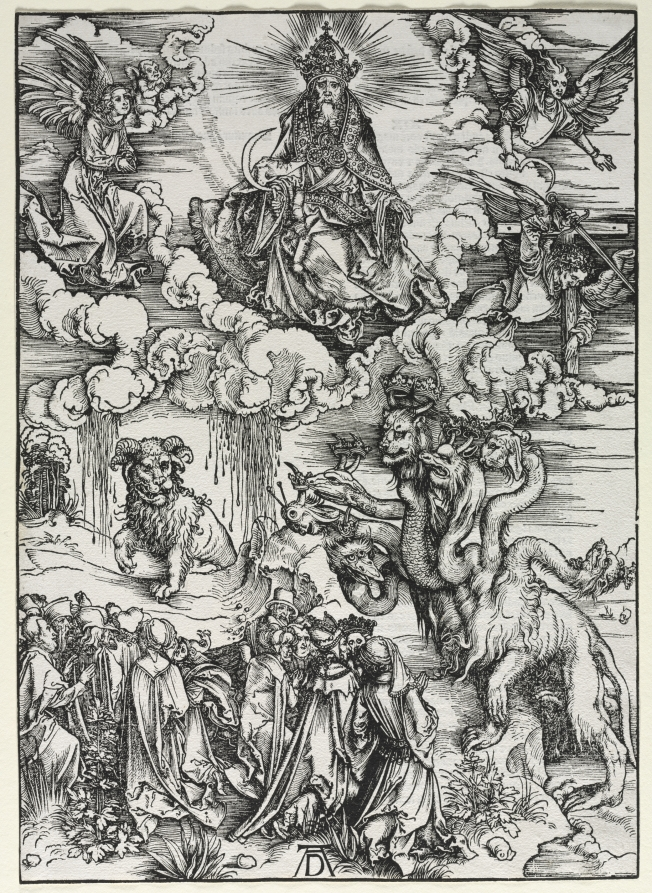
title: Revelation of St. John: Beast with Ram's Horns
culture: Germany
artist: Albrecht Dürer (German, 1471–1528)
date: 1511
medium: woodcut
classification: Print